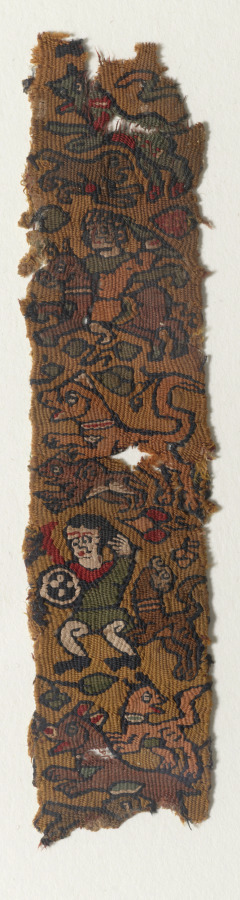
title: Three Fragments from a Border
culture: Egypt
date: before 1968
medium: tapestry; wool and linen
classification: Textile